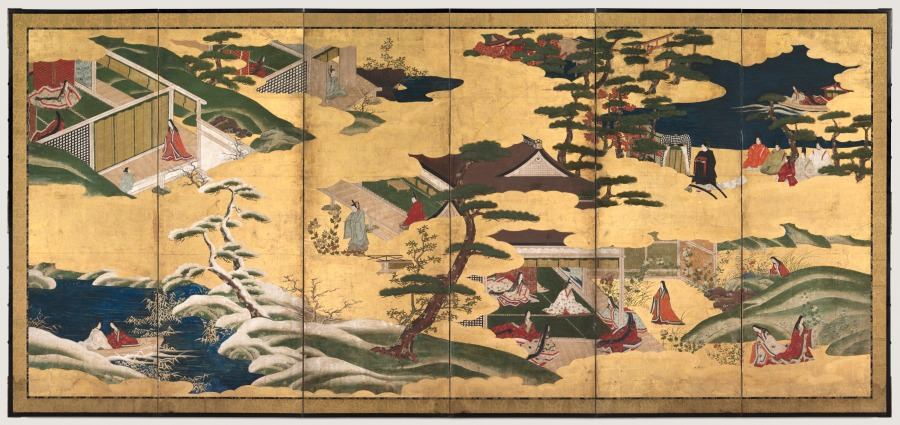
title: Scenes from the Tale of Genji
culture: Japan, Edo period (1615–1868)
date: late 1700s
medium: Pair of six-panel folding screens; ink, color, and gold on gilded paper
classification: Painting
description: Folding screens served as temporary dividers in traditional Japanese open-plan architectural spaces. This pair was inspired by Japan’s most celebrated work of literature, the Tale of Genji, written by Murasaki Shikibu, an attendant to the empress in the early 11th-century imperial court. The novel follows the love life of the “Shining Prince” Genji and delves into the psychological states of his many companions. Distinct episodes are nestled within a matrix of golden clouds and landscape elements. Each screen includes six episodes presented in a nonlinear fashion, capturing scattered highlights of the story.